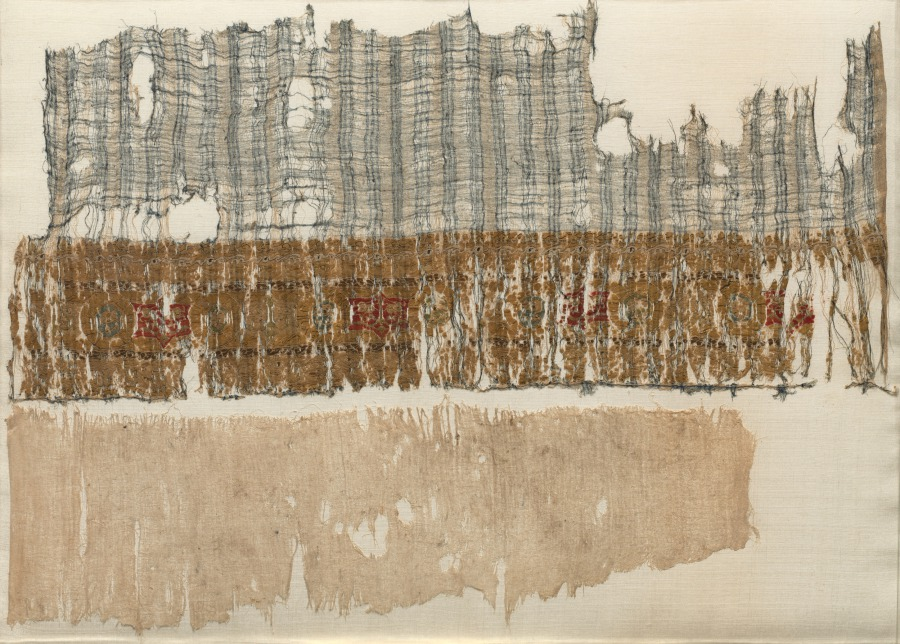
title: Fragment of a Tiraz-Style Textile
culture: Egypt, Fatimid period, Caliphate of al-Musta'li, AH 487-495 (A.D. 1094-1101)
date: 1094 – 1101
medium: tabby ground with inwoven tapestry ornament; linen and silk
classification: Textile